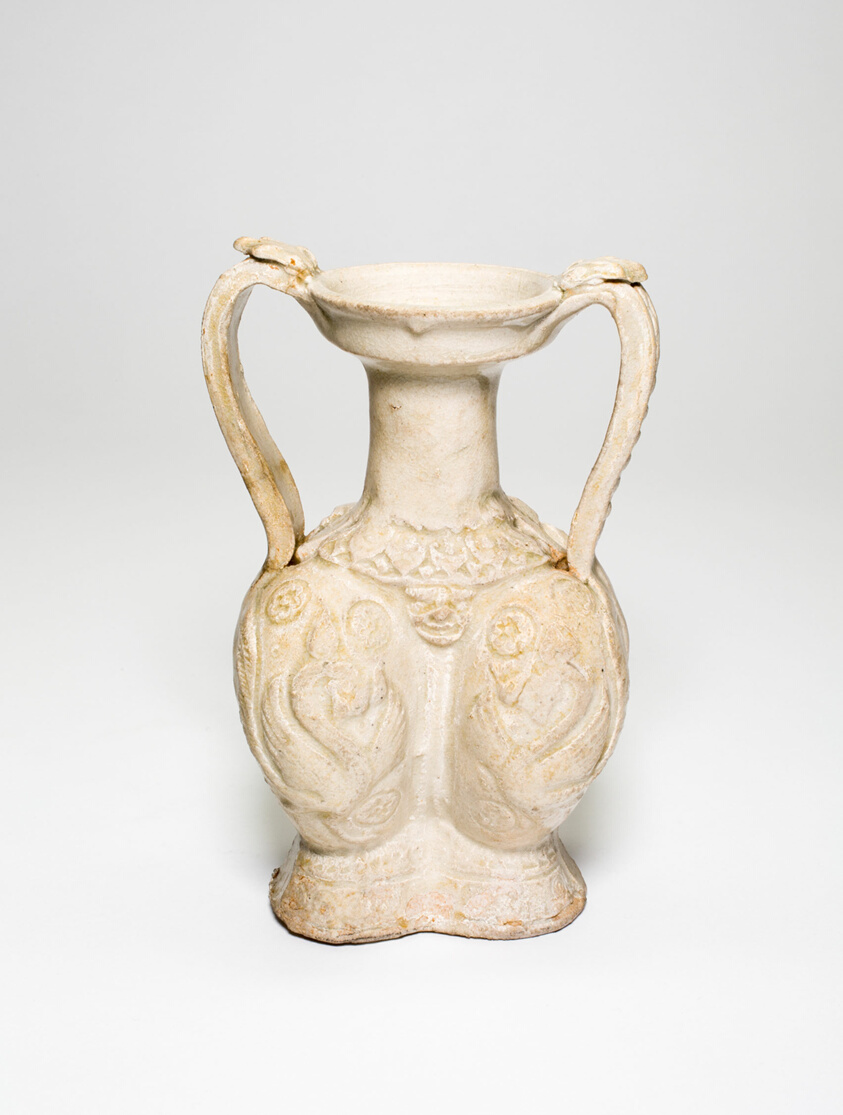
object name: Vessel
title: Double-Bodied Amphora Vase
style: Chinese (culture or style)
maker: China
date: Sui dynasty (581–618)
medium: Stoneware with underglaze molded decoration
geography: China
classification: vase; vessel; stoneware; asian art; ceramics